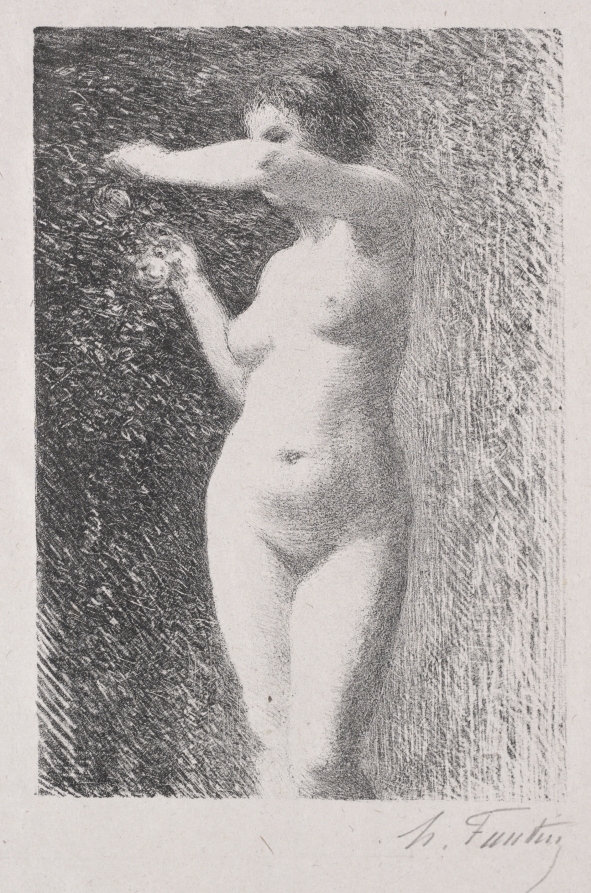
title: Study for Eve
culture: France, 19th century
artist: Henri Fantin-Latour (French, 1836–1904)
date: 1898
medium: lithograph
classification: Print